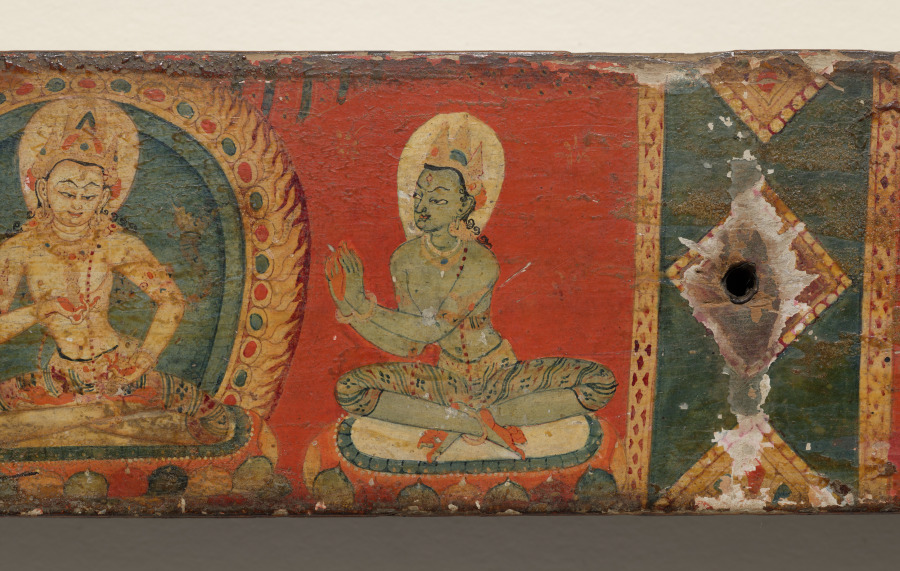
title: Four bodhisattvas and two attendants flanking Vajrasattva, bottom cover, from a Manuscript of the Perfection of Wisdom in Eight Thousand Lines (Ashtasahasrika Prajnaparamita-sutra)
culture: Eastern India, Bihar, Vikramashila Monastery. Painting: Nepal, Kathmandu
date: Sunday, September 14, 1119 (year 239 of the Newar Samvat in the month of Ashvina)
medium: Gum tempera, paper, and colors on wood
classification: Painting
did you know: The diamond pattern at the holes references the ribbons and cords that would have bound the book together.